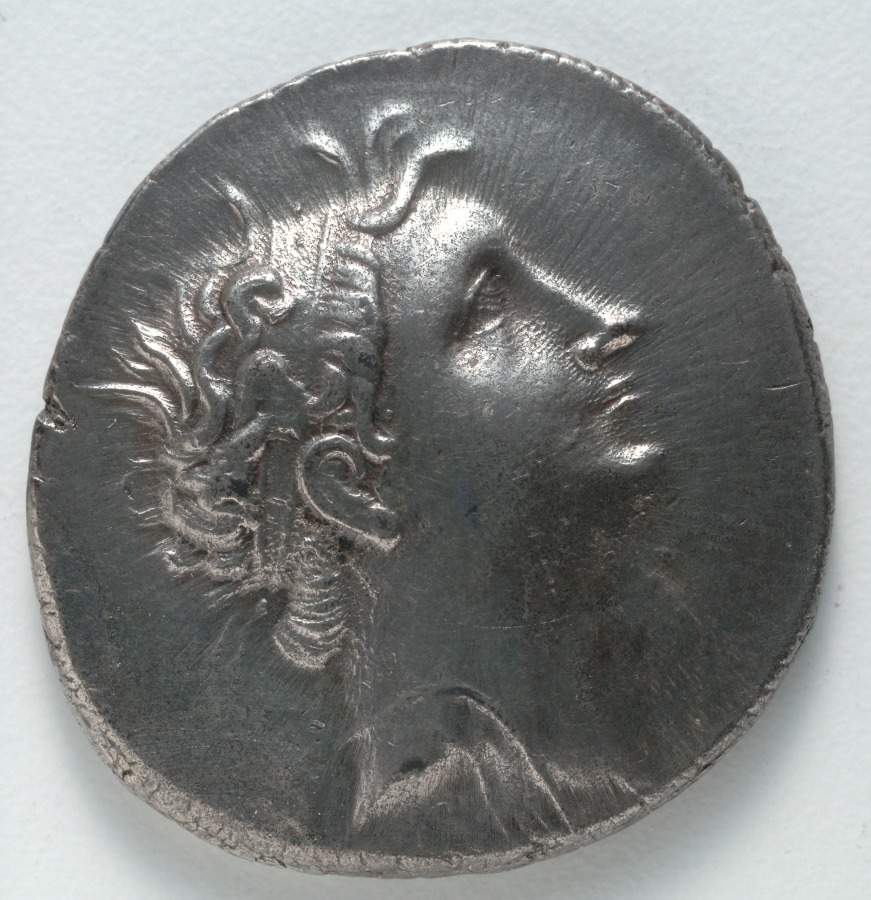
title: Tetradrachm: Head of Nicomedes II (obverse); Zeus (reverse)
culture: Greek, Bithynian, minted in Bithynia, reign of Nicomedes II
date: 149–120 BCE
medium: silver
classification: Coins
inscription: ΒΑΣΙΛΕΩΣ | ΕΠΙΦΑΝΟΥΣ | ΝΙΚΟΜΗΔΟΥ